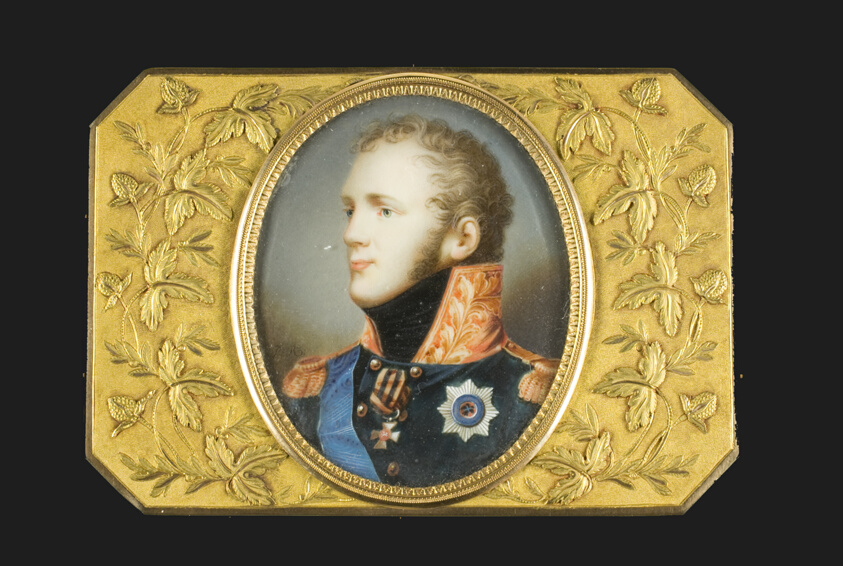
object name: Metalwork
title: Snuff Box: Portrait of Tsar Alexander I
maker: Vienna, Austria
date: 1816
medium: Gold, enamel, and glass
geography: Vienna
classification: snuff box; european decorative arts; metalwork